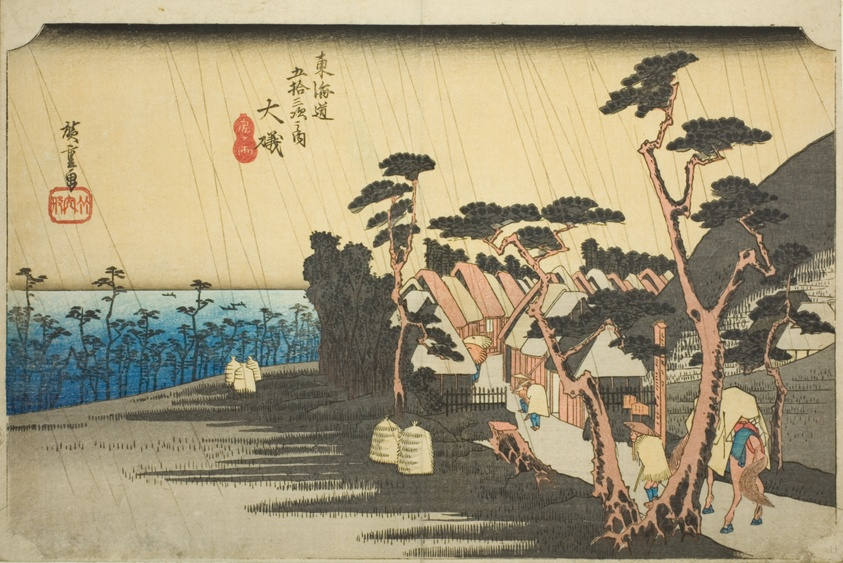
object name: Print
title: Oiso: Tora's Rain (Oiso, Tora ga ame), from the series "Fifty-three Stations of the Tokaido Road (Tokaido gojusan tsugi no uchi)," also known as the Hoeido Tokaido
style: Japanese (culture or style)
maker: Utagawa Hiroshige 歌川 広重; Japanese, 1797-1858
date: c. 1833/34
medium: Color woodblock print; oban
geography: Japan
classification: woodblock print; print; asian art